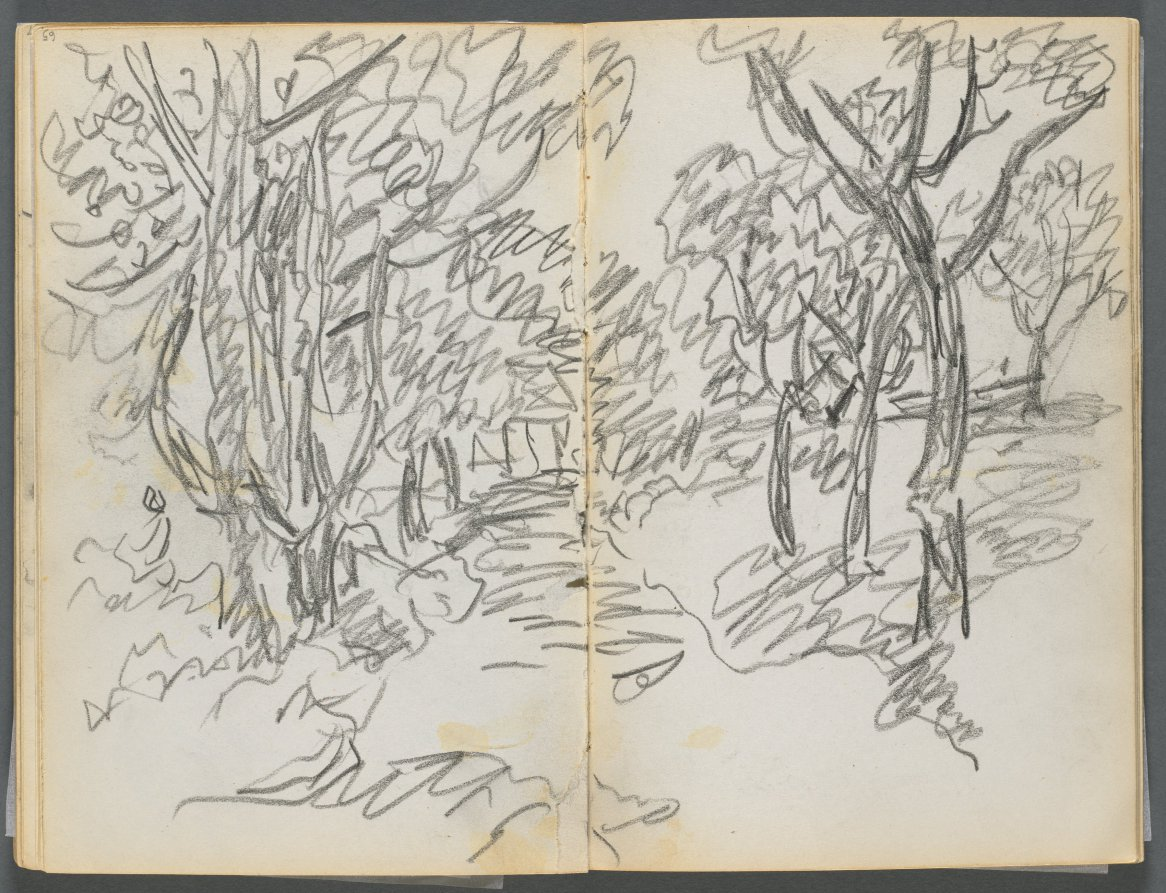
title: Sketchbook, The Dells, N° 127, page 064 & 65: Landscape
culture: America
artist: Maurice Prendergast (American, born Newfoundland [now Canada], 1858–1924)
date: c. 1919–1921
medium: graphite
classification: Bound Volume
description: This sketchbook contains 59 pages of graphite drawings and 16 watercolors made at various locations on Cape Ann, Massachusetts.